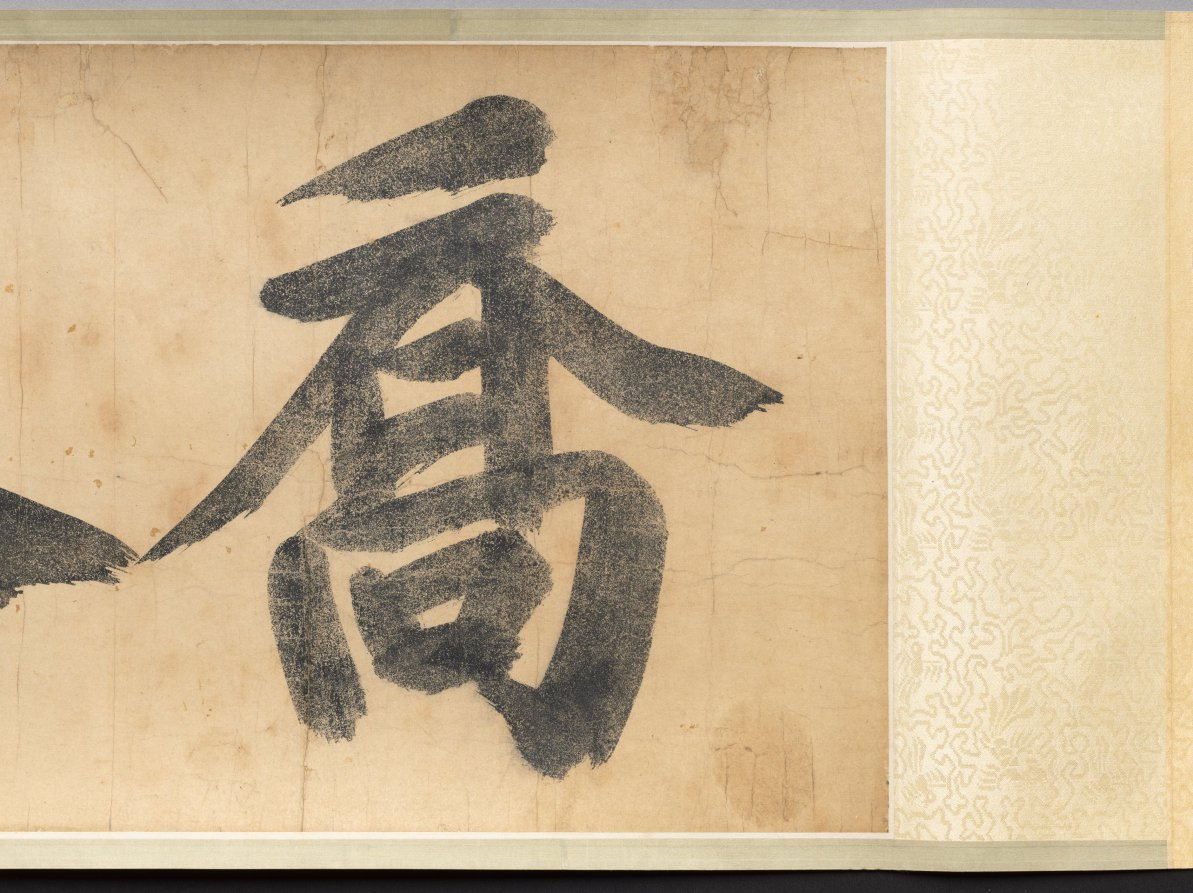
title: A Hundred Sparrows in a Lofty Grove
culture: China, Ming dynasty (1368–1644)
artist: attributed to Lin Liang (Chinese, 1416–1480)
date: 1368–1644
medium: handscroll; ink on silk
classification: Painting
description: Sparrows engaged in all kinds of activities frolic amid leafy branches, blades of grass, rocks, and a waterfall. As our eyes move over the scroll, the artist engages us in enjoying the sparrows’ carefree movements in a natural setting. The charming birds were painted from close observation in swift and fluent brushstrokes. Sparrows are a common bird and in Chinese painting they often represent the commoner in human society as opposed to the noble pheasant or peacock representative of the ruling class.